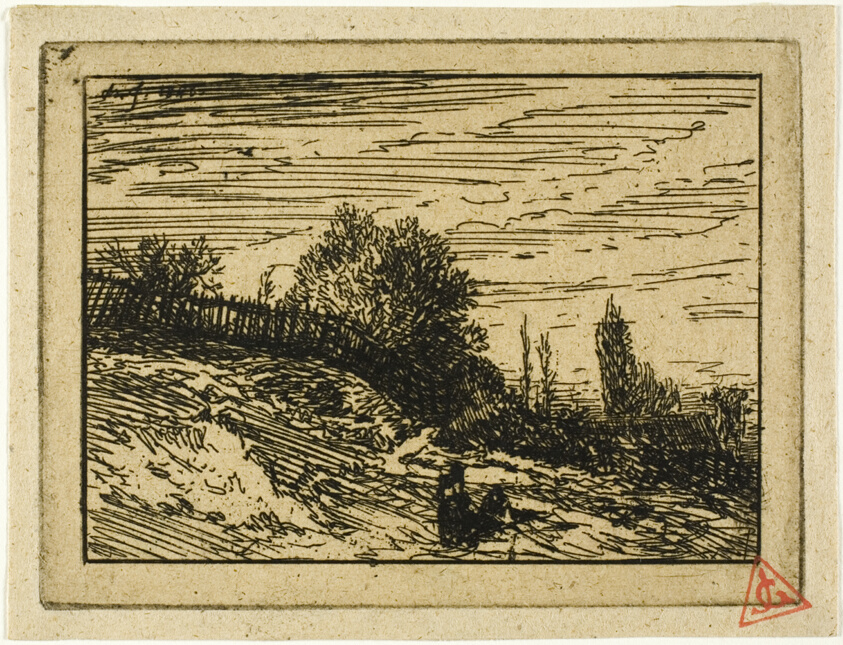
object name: Print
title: The Thicket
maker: Charles Émile Jacque (French, 1813-1894)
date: 1846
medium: Etching on buff chine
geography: France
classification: etching; print; prints and drawing